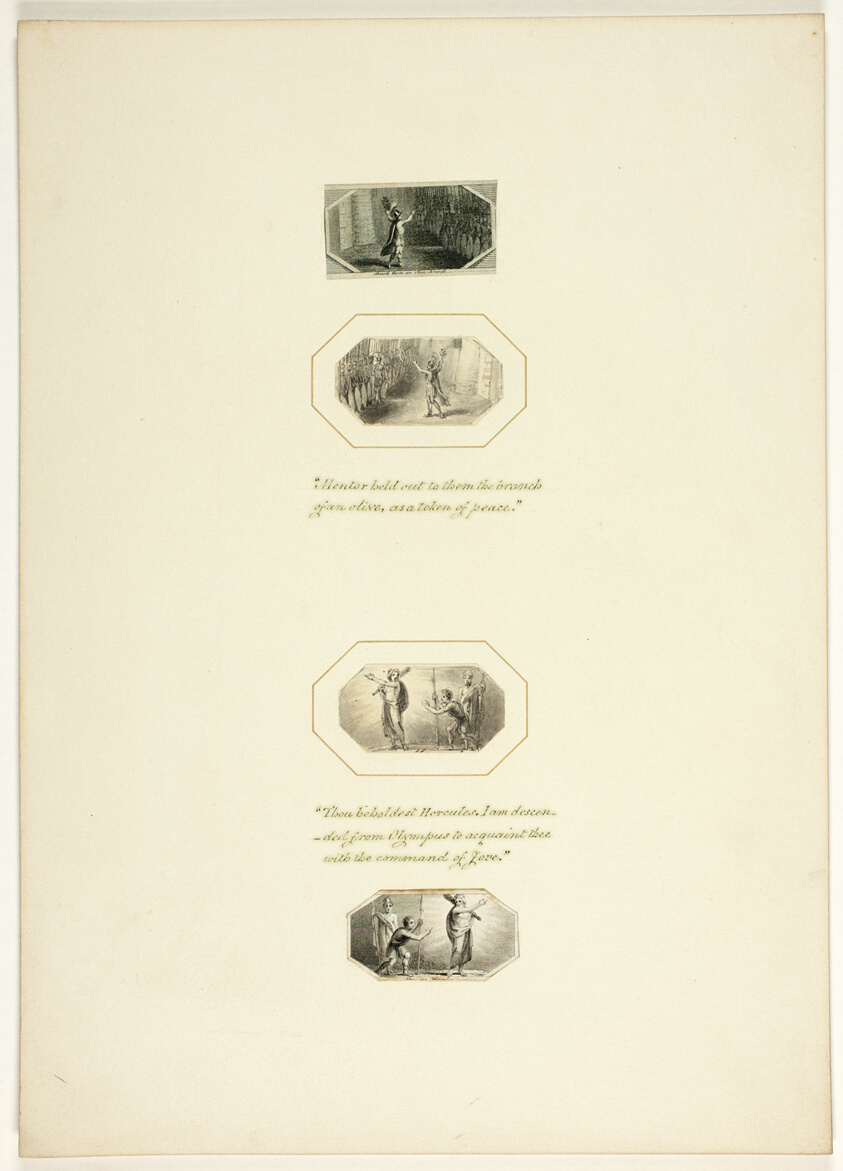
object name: Print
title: Plate from Telemachus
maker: after Thomas Stothard (English, 1755-1834); published by T. Baker (English, 19th century)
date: c. 1797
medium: Engraving on paper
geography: England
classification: engraving; drawings (visual works); prints and drawing; print